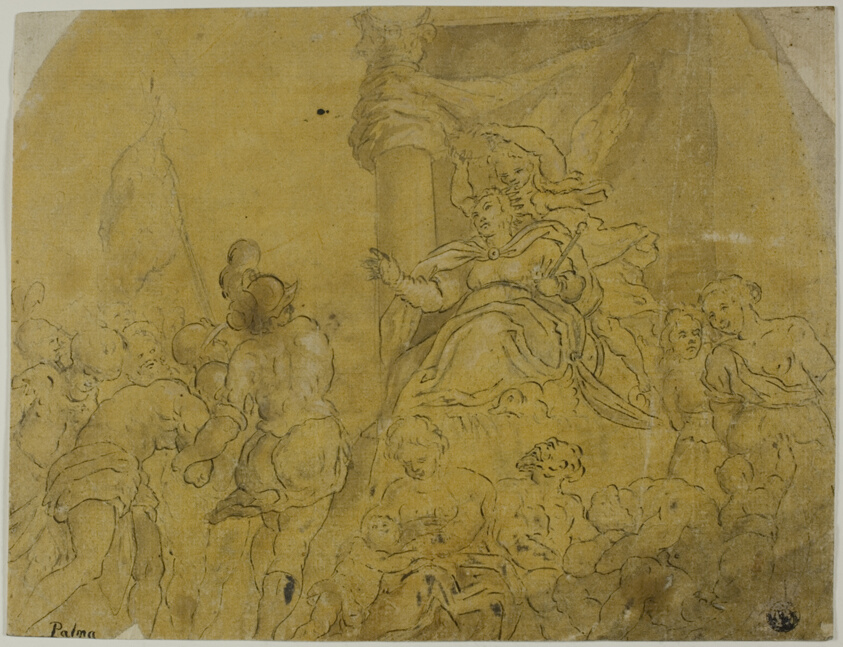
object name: Drawing and Watercolor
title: Study for Venice, Crowned by Victory, Receiving Her Subject Peoples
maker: After Jacopo Negretti, called Palma il Giovane; Italian, c. 1548-1628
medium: Pen and black and brown ink, with brush and brown wash, heightened with lead white (partially oxidized), on laid paper prepared with orange wash, laid down on tan laid paper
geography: Italy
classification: ink with wash; drawings (visual works); prints and drawing